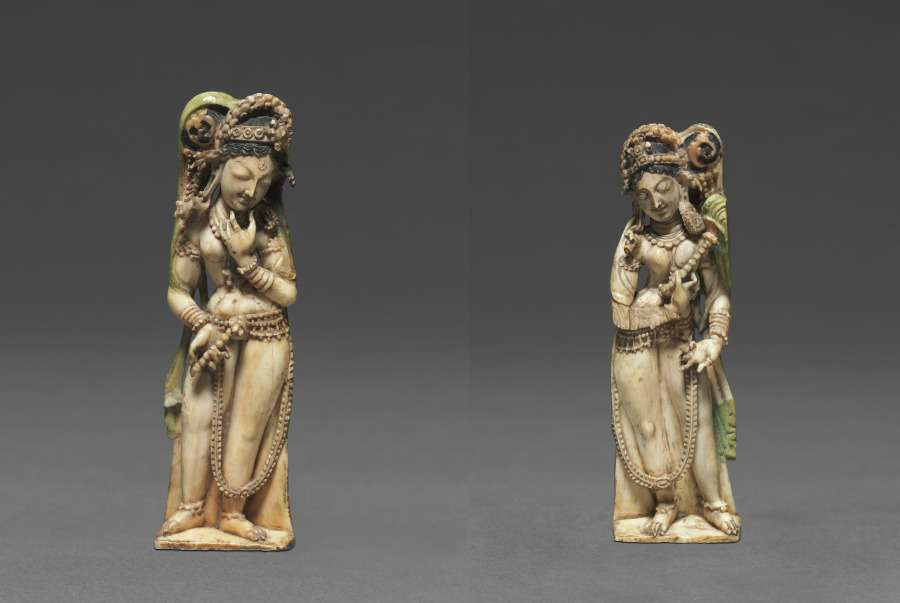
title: Female Attendants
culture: India, Kashmir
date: 700s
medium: ivory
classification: Ivory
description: These elegant female figures would have originally been in a portable, wooden shrine with a central ivory depicting the Buddha. One holds a chaurī, or flywhisk, a frequent attribute of attendants, while the one originally on the left holds a lotus. Both display a graceful contraposto (tribhanga). Their rich jewelry contrasts successfully with the softness of their flesh.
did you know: Traces of turquoise paint remain on their bodies, suggesting the presence of fabric.